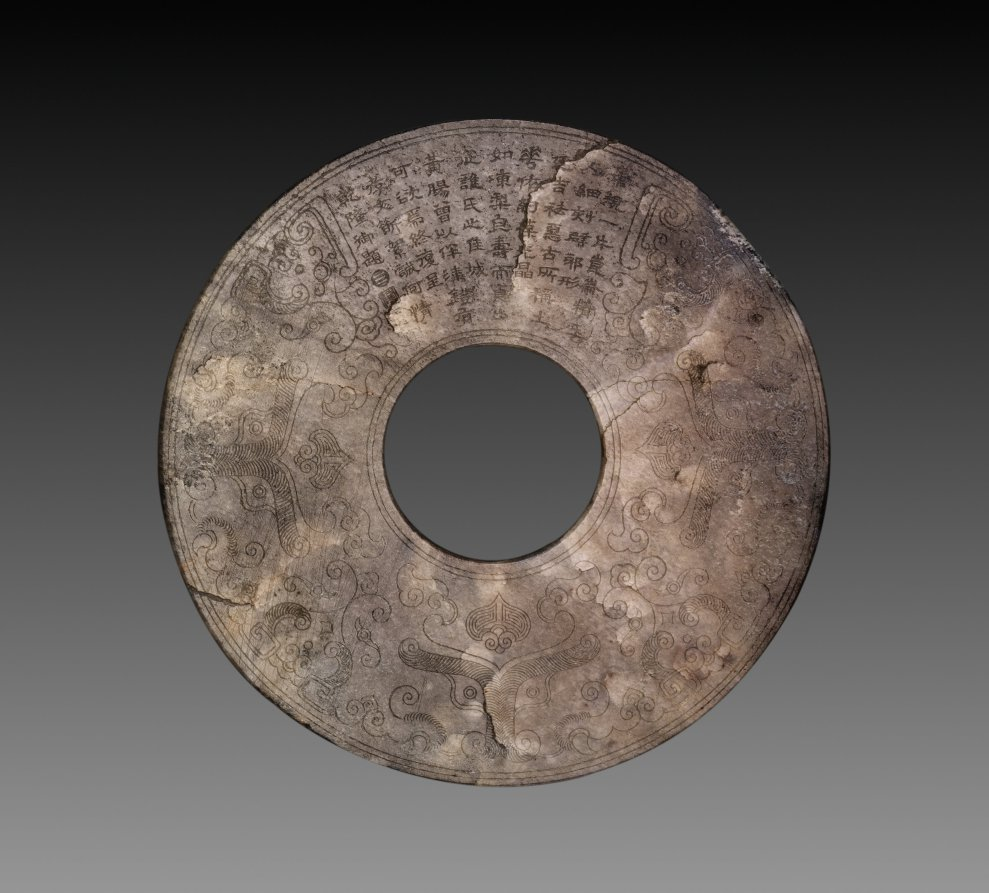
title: Disc (bi) with Imperial Poem in Seal Script (zhuanshu) by the Qianlong Emperor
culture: China, Qing dynasty (1644–1911), Qianlong reign (1736–95)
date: 1736–95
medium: White jade with brown mottling, historic jade, recut and incised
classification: Jade